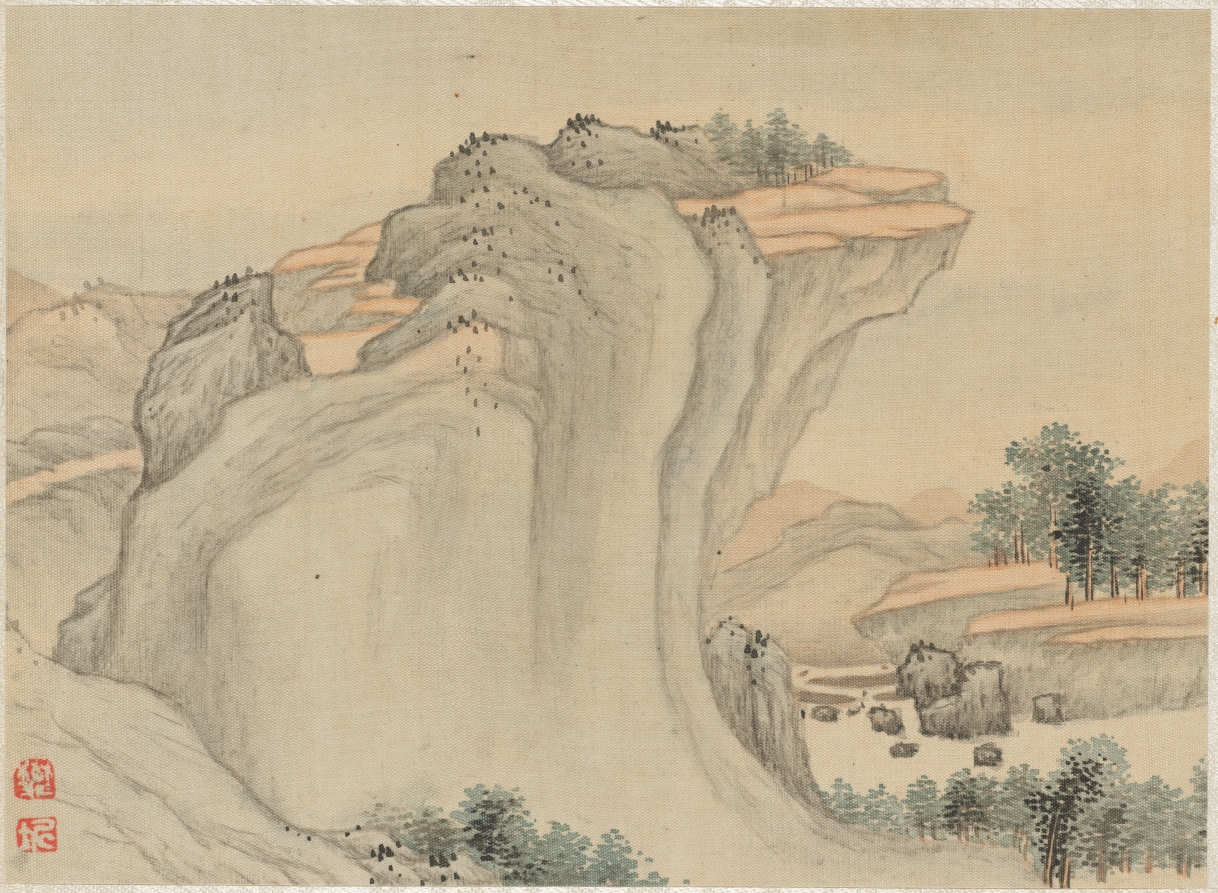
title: Album of Miscellaneous Subjects, Leaf 4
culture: China, Qing dynasty (1644-1911)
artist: Fan Qi (Chinese, 1616–after 1694)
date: early 1650s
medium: album leaf, ink and color on silk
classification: Painting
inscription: Artist seal: Fan Qi 樊圻. Poem by Xu Fang 徐枋 (1622–1694): By chance, I start my journey from the watershed to remote regions,/ Suddenly I sight the silhouette of mountains - myriad expanses of green./ What is this "Come-flying" Peak which now does not recede,/ Its rocky walls, linked to heaven, are drenched by a waterfall.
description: The fourth painting by Fan Qi alludes to Wang Wei's poetic lines: In empty hills, there is no one there; Yet one can hear the sound of conversation. The calligraphic colophon by Xu Fang adjacent to the painting reads: By chance, I start my journey from the watershed to remote regions, Suddenly I see the silhouette of mountains, myriad expanses of green. What is this Feilai Peak which now does not recede? Its rocky walls, linked to heaven, are drenched by a waterfall.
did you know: There is no sign of human presence in this sunny landscape dominated by a bold flat-topped cliff.